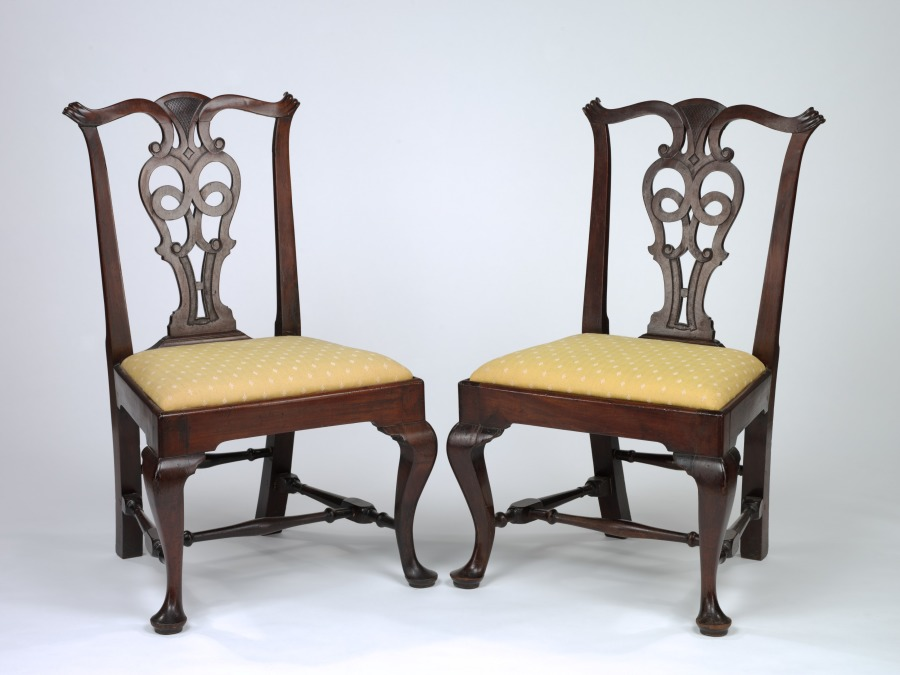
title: Pair of Side Chairs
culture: America, Rhode Island, Newport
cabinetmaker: John Townsend (American, 1732–1809)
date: c. 1775–90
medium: mahogany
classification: Furniture and woodwork